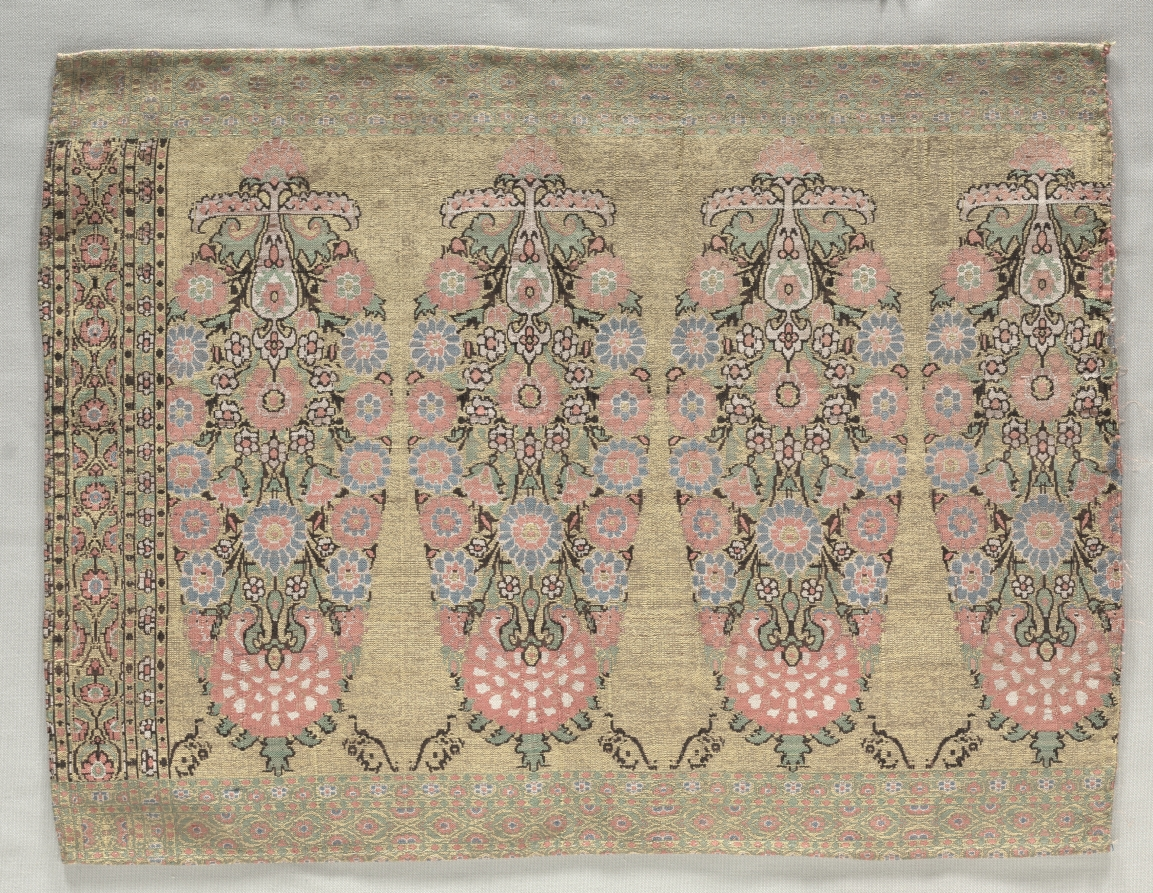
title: Two Pieces from a Scarf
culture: Iran, 18th century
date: 1700s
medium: brocade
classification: Textile